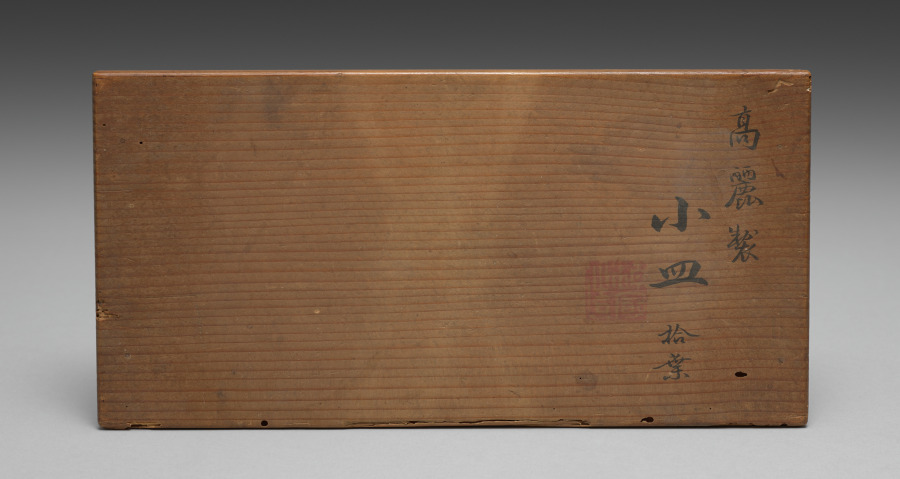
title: Dining Set with Plum Blossoms and Cracked-Ice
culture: Japan, Edo period (1615–1868) to Meiji period (1868–1912)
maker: Seifū Yohei II (Japanese, 1844–1878)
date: 1875–78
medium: Porcelain with molded designs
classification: Ceramic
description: Each item in this set has a delicate low-relief design of flowering plum branches over scattered, intersecting lines meant to resemble the cracked-ice surface of a frozen body of water and is signed on the base in gold pigment. While Yohei II produced many fine works in underglaze blue, like those produced by Kiyomizu Shichibei, he also made works in quite different styles later in his career, from the early 1870 s. In 1873, he was appointed purveyor to the Industrial Center of Kyoto Prefecture, a designation associated with Kyoto’s efforts to reach an international market through the port of Kobe; and from 1875 until his death, he was involved in national-level projects to present Japanese ceramics across the world. It was during this period that Yohei III was apprenticed to Yohei II, and it has been suggested that this set may in fact be an early example of Yohei III’s work, which he signed with his teacher’s name. Decorated with flowers resembling Japanese textile motifs, the set calls to mind the design of Yohei II’s pair of vases with plum blossoms in the Victoria and Albert Museum. Here, the elaborate trees created for a formal public exhibition setting have been translated into the approachable blossoms of the genteel domestic environment. While the designs are consistent across the pieces, each raised flower petal and pistil and each incised line in the ice was done by hand, so the cups, bowls, and dishes are similar yet unique. The bottoms of two boxes once identified the set’s owner, but the information has been deliberately obscured with black ink. However, inscriptions still visible appear to indicate two occasions, once at the end of July 1886 , and once again in June 1916 , when parts of the set were requested from Hokura in Niigata Prefecture. The location corresponds to a neighborhood in the present-day city of Jōetsu. The surname Tsuji 辻 also appears on a paper tag affixed to one of the box cloths. Future research may possibly reveal more about their provenance. A vase by Yohei III in a private collection combines the formal grandeur of the Yohei II vases in the Victoria and Albert Museum with the gentler design of this dining set, placing flowering plum trees against soft, scalloped-edge clouds resembling those in golden screens.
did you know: The dining wares have a creamy white coloration that the four boxes containing them identify as Korean in style.